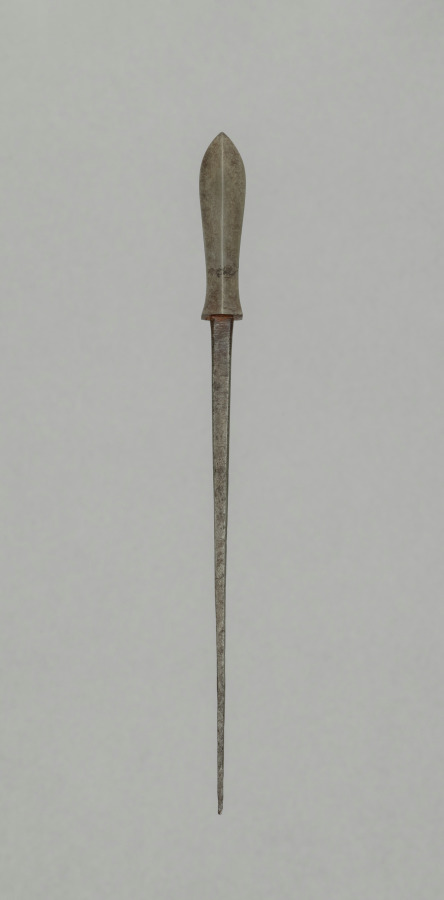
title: Arrow Point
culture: Japan, Edo period (1615–1868)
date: 1700s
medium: steel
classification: Arms and Armor